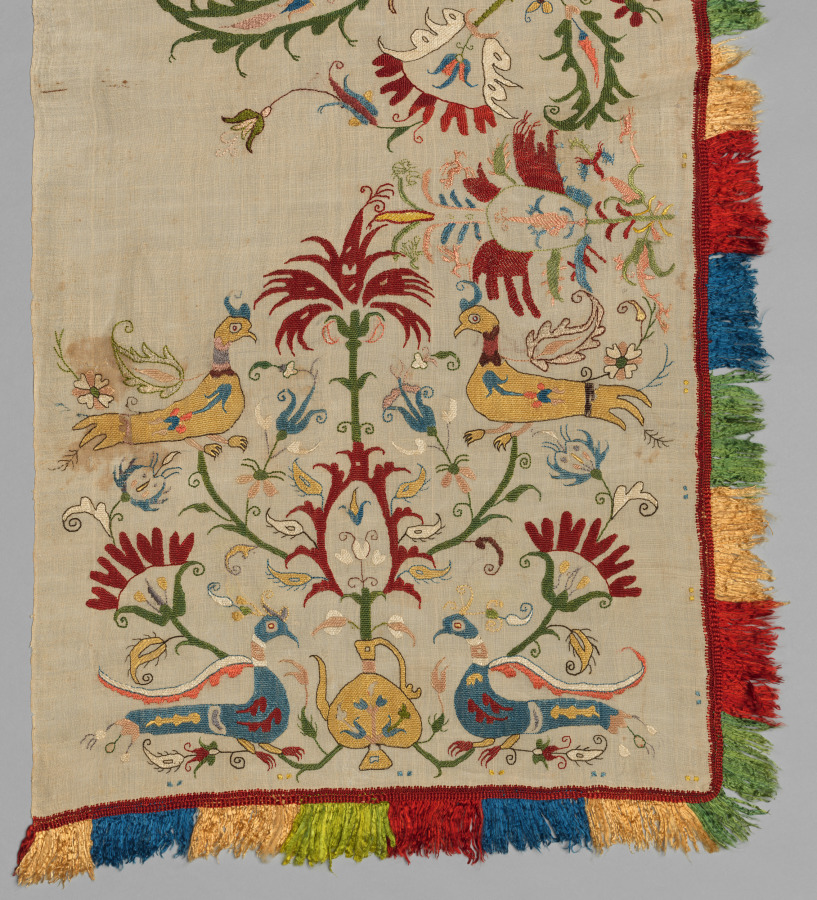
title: Side Panel of a Bedspread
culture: Greece, Sporades Islands, Skyros, 18th century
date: 1700s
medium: embroidery: silk on linen tabby ground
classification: Embroidery